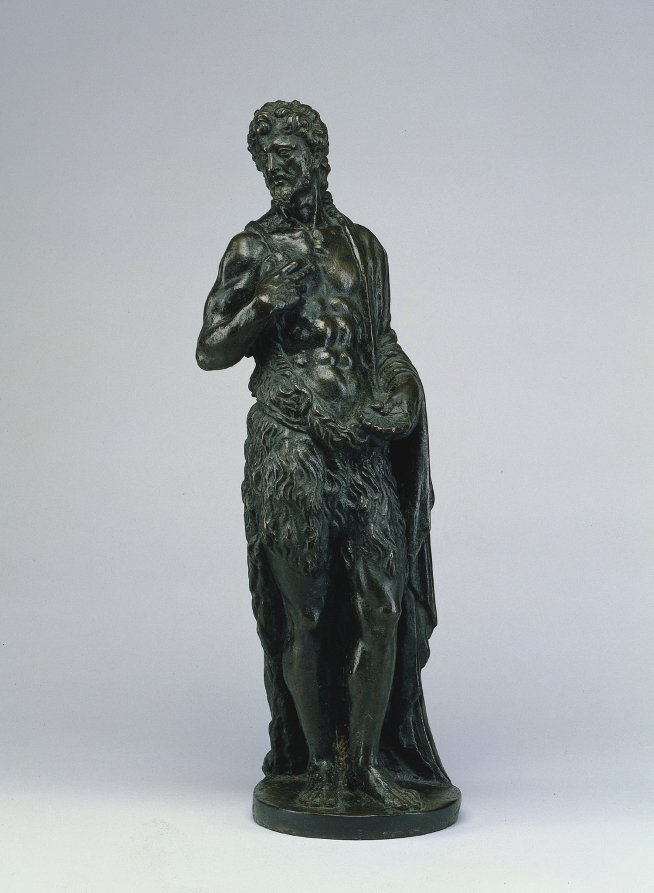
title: Saint John the Baptist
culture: Italy, Verona, 16th century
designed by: Angelo de Rossi (Italian)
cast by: Giuseppe de Levis (Italian, 1605)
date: late 1500s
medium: bronze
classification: Sculpture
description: Saint John wears the hair shirt he fashioned during his retreat into the wilderness to live humbly. He clenches a device of baptism, a shell to pour the water.